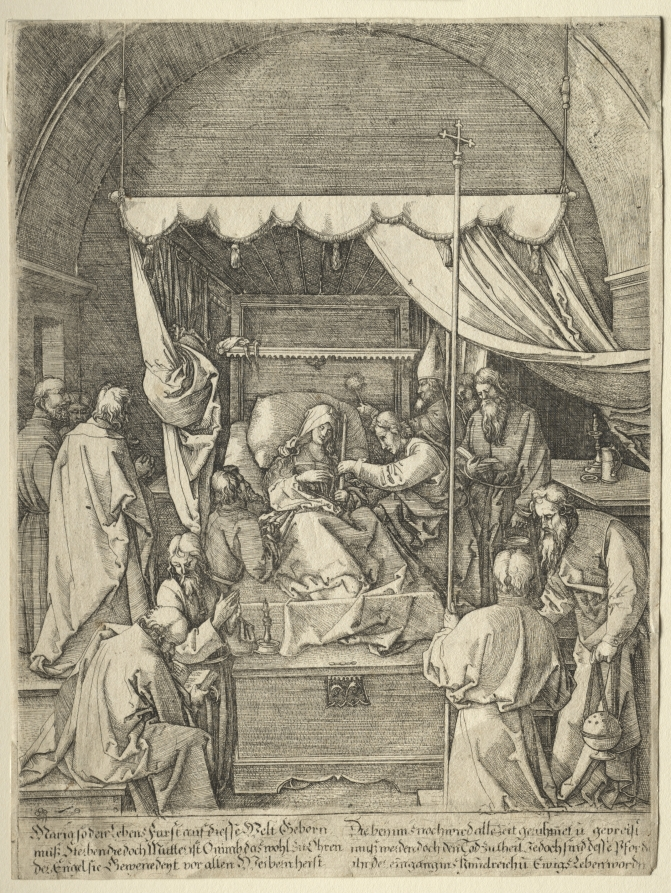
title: The Death of the Virgin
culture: Germany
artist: Hieronymus Hopfer (German)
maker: after Albrecht Dürer (German, 1471–1528)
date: 1528–63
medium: etching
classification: Print